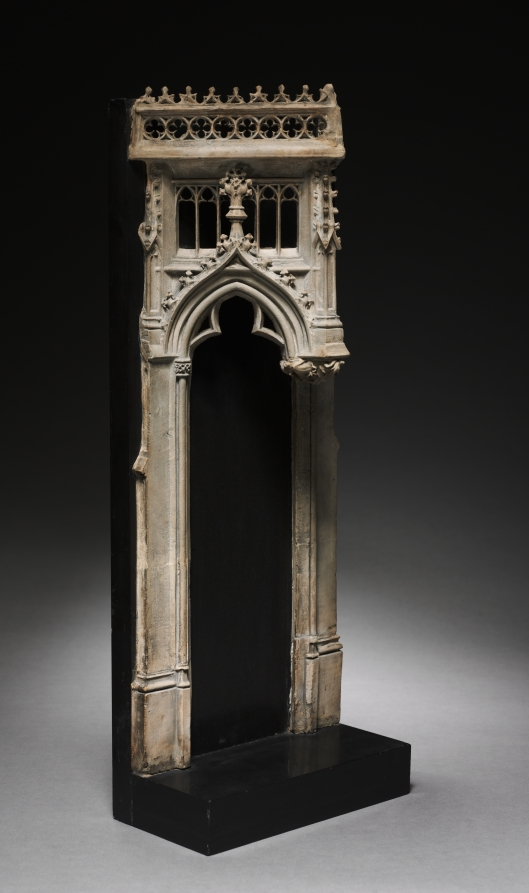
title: Architectural Canopy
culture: France, Burgundy, 15th century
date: c. 1450–1475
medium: limestone from Tonnerre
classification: Sculpture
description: Part of a pair of canopies, both must have originally belonged to an architectural ensemble like a tomb or a choir screen set within a church. Strikingly carved as architecture in miniature, they contain all of the elements of Flamboyant Gothic architecture of the late 15th century, so named after its flame-like stone tracery with wavy ornaments. This style of architecture is characterized by its intricacy of detailing and virtuosity of workmanship. Small sculptures may have originally occupied the space beneath the canopies.